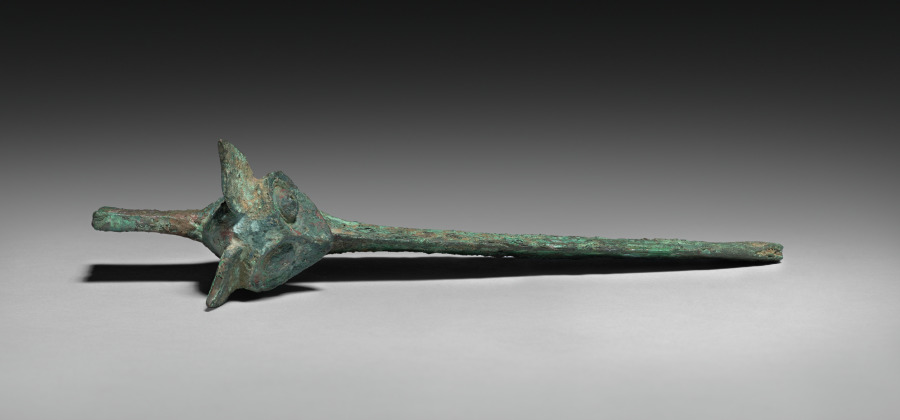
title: Axe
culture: China, Shang dynasty (c. 1600–c. 1046 BCE)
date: 1766–1045 BCE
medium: bronze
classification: Metalwork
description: The head of an owl with large eyes and ears, sitting above the blade of a halberd-axe, may have deterred evil and harm from its carrier. Whether such an axe was used in ritual or warfare is not clear.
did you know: A staff or pike would have attached to the blade via the socket below the owl's head.